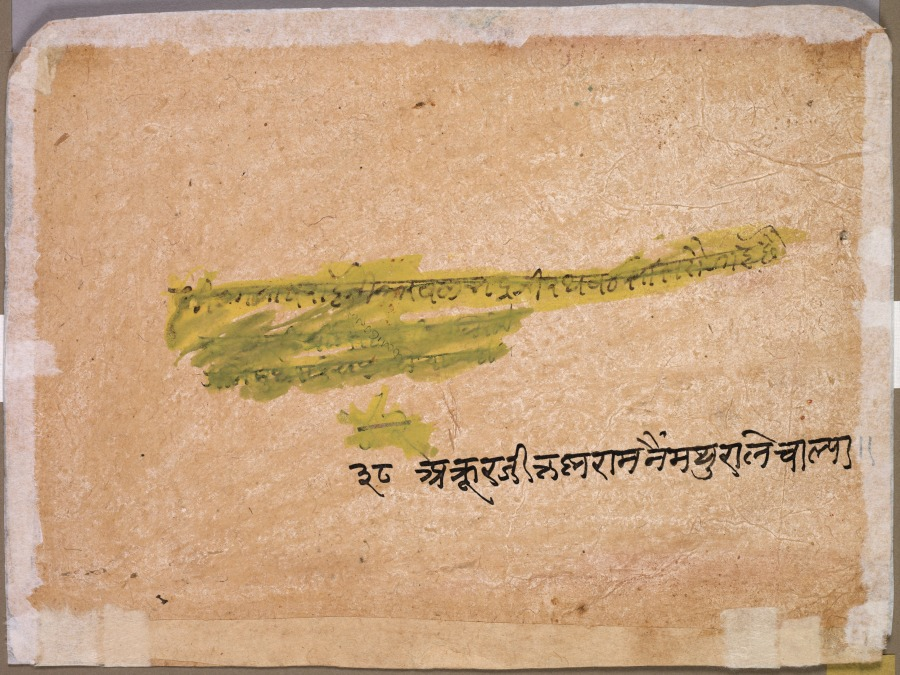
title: Akrura Drives Krishna and Balarama to Mathura, from the “Isarda Bhagavata Purana”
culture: Northwestern India, Rajasthan, Isarda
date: c. 1560–70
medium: Gum tempera and ink on paper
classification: Painting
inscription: [[verso, crossed out, in center]] 42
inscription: [[recto, upper right corner]] 42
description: A page from a Hindu manuscript shows the dark-skinned Krishna and his white-skinned brother leaving their companions in the cowherd village where they grew up. They are on their way to confront their evil uncle who killed their siblings and imprisoned their parents. Their gestures urgently indicate the direction of their journey. A preference for the color pink in the sky, chariot, and garments distinguishes this work from those of pre-Mughal creation.